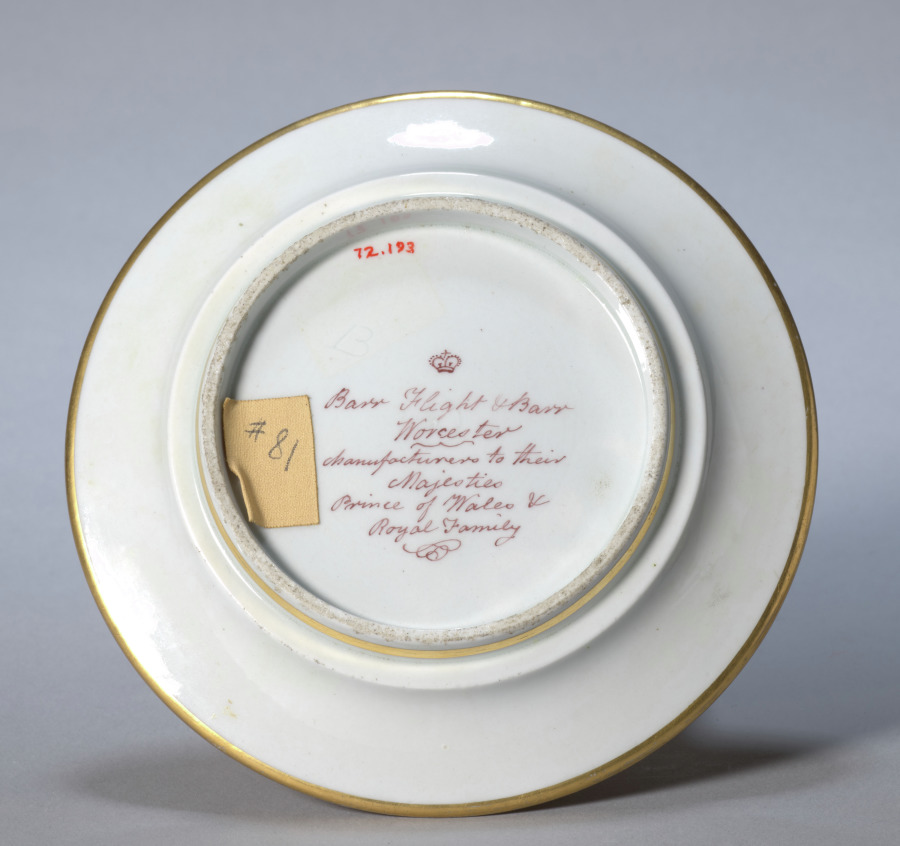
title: Dish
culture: England, Worcester, early 19th Century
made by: Worcester Porcelain Factory (British, established 1751)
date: c. 1810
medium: soft-paste porcelain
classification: Ceramic